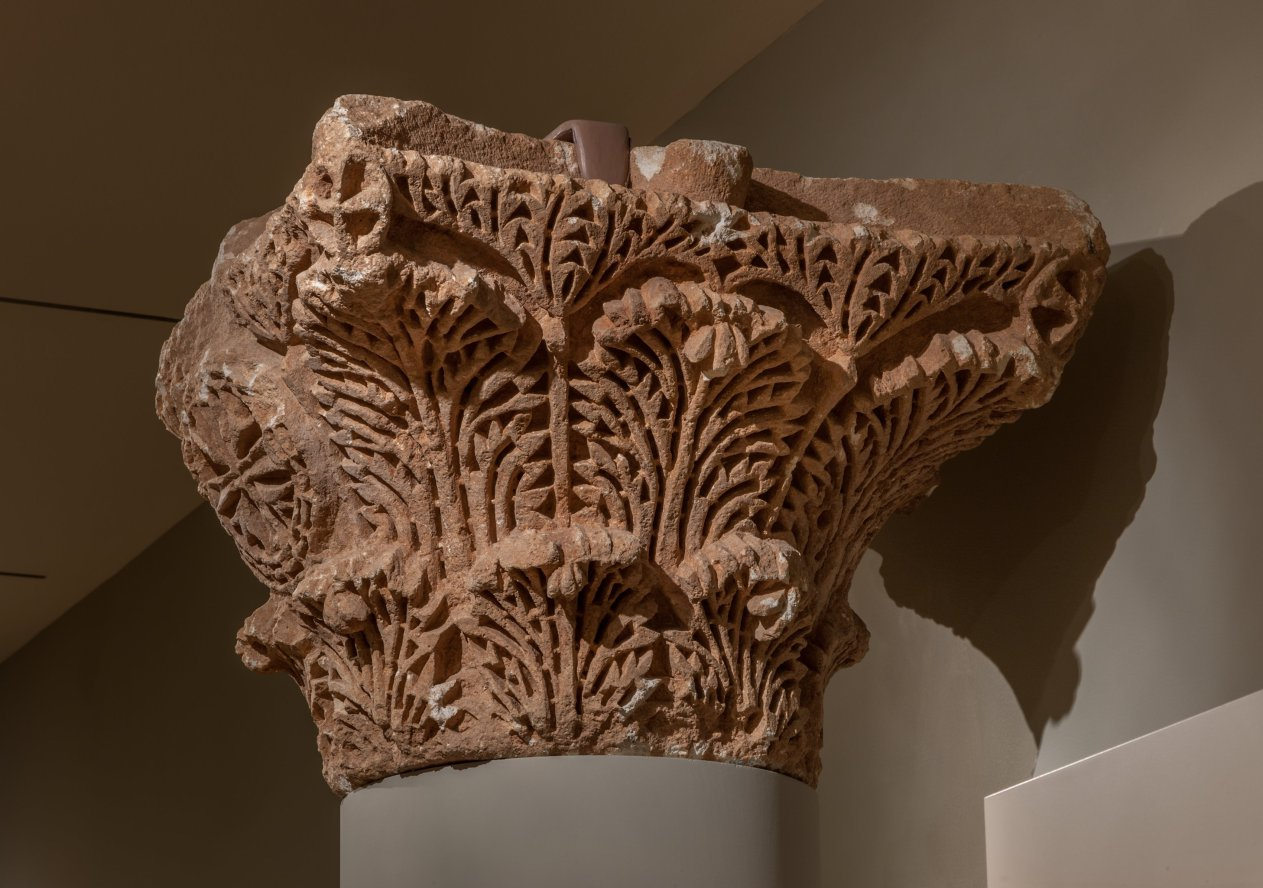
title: Capital with Acanthus and Crosses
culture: Byzantium, Northern Syria, Byzantine period, 5th century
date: 400s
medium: limestone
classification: Sculpture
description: These capitals - the Capital with Acanthus and Crosses and the Engaged Capital with Windblown Acanthus - may have been found in Northern Syria and presumably come from a large and important church. Both capitals are decorated with leaves of acanthus, a fleshy plant with jagged leaves native to the Mediterranean area. One capital is symmetrical with crosses in its ornament, the other is asymmetrical and gives the impression of windblown leaves.